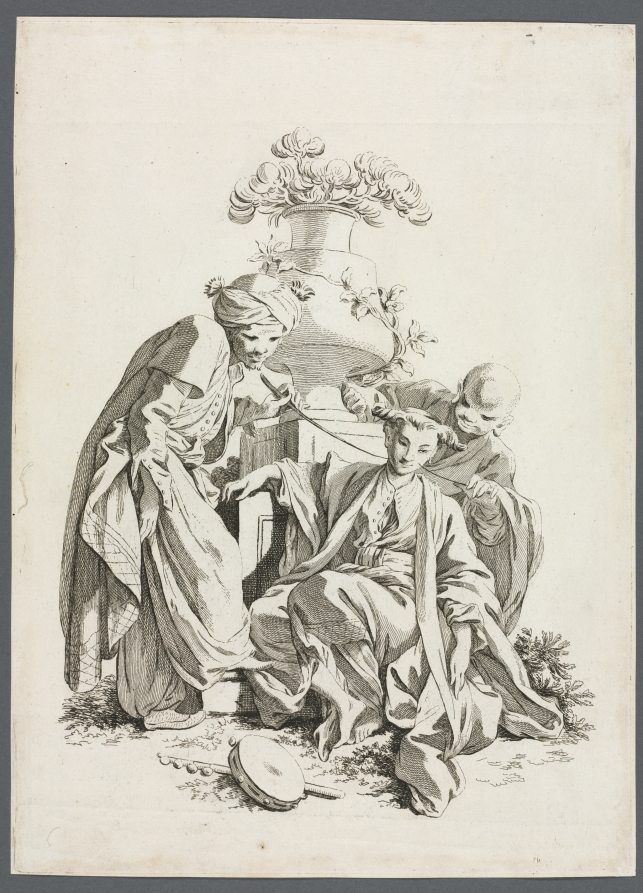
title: The Senses: Touch (after Boucher)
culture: France, 18th Century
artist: Gabriel Huquier (French, 1695–1772)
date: c. 1730–70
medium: etching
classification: Print